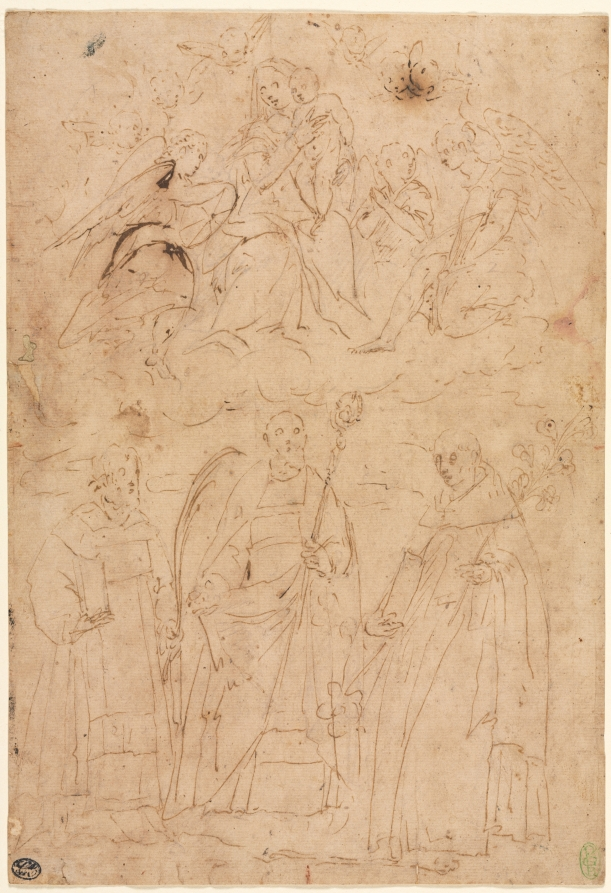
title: Madonna and Child in Glory above Three Saints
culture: Italy, 16th century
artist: Giovanni Battista Paggi (Italian, 1554–1627)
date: c. 1570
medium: pen and brown ink (iron gall) over black chalk(?)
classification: Drawing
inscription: lower right, in black ink (on tab of paper attached from verso): 11 ; VERSO OF SECONDARY SUPPORT, upper left, in graphite: GO/ - L ; center, in graphite: c+o [in ligature] ; lower right, in graphite: TEAUM ; lower right, in graphite: K1931 ; lower right, in purple pencil and graphite: £ 30 ; lower right, in graphite: 42